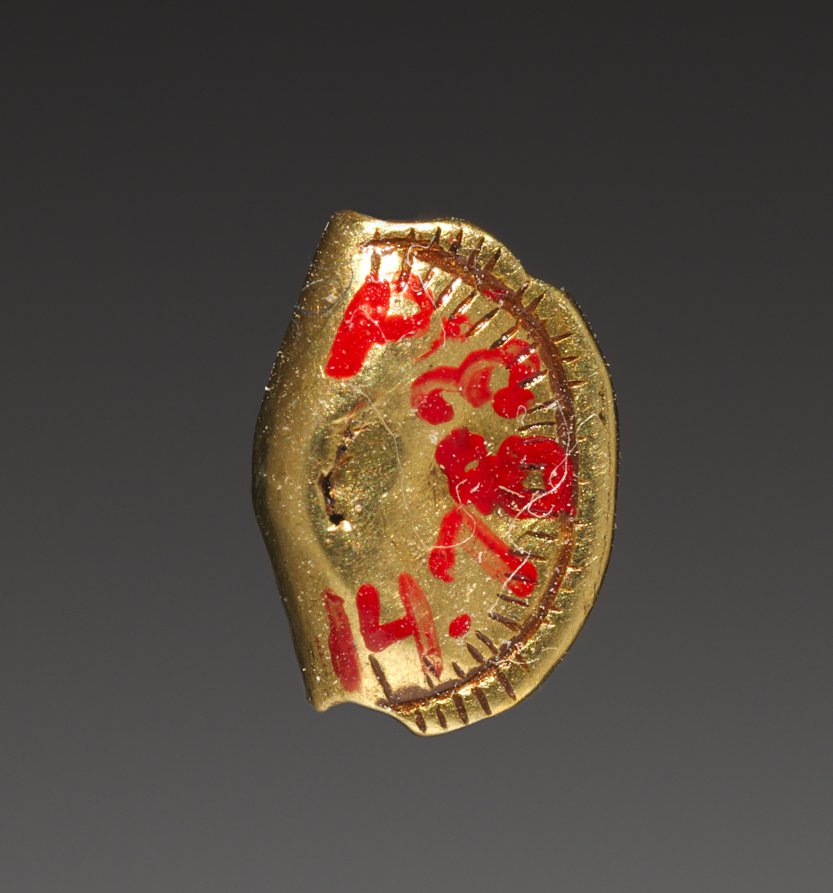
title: Wallet Bead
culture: Egypt, New Kingdom (1540–1069 BCE), Dynasty 18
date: 1540–1296 BCE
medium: gold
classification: Jewelry